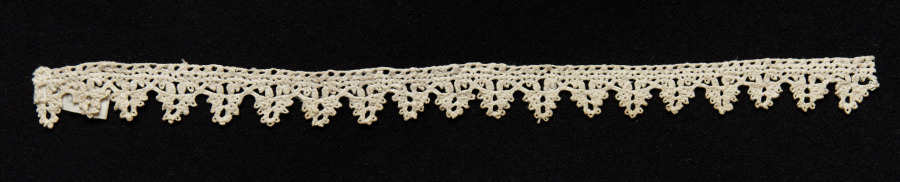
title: Lace Edging of Points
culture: Italy, Genoa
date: 1550–99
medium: Bobbin lace (needle lace [cutwork] design)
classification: Lace